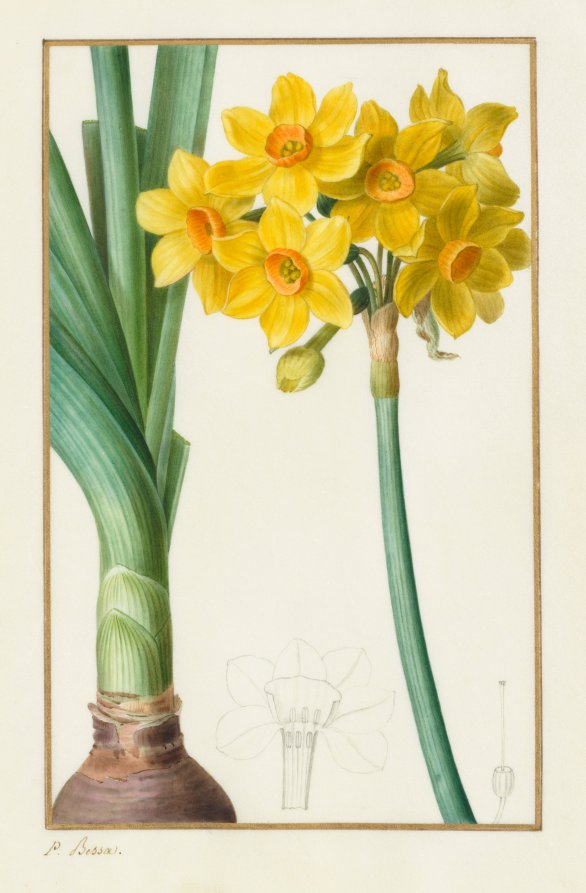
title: Polyanthus or Cluster Narcissus (Botanical: Narcissus tazetta)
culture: France, 19th century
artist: Pancrace Bessa (French, 1772–1846)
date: 1836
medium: pencil and watercolor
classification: Drawing